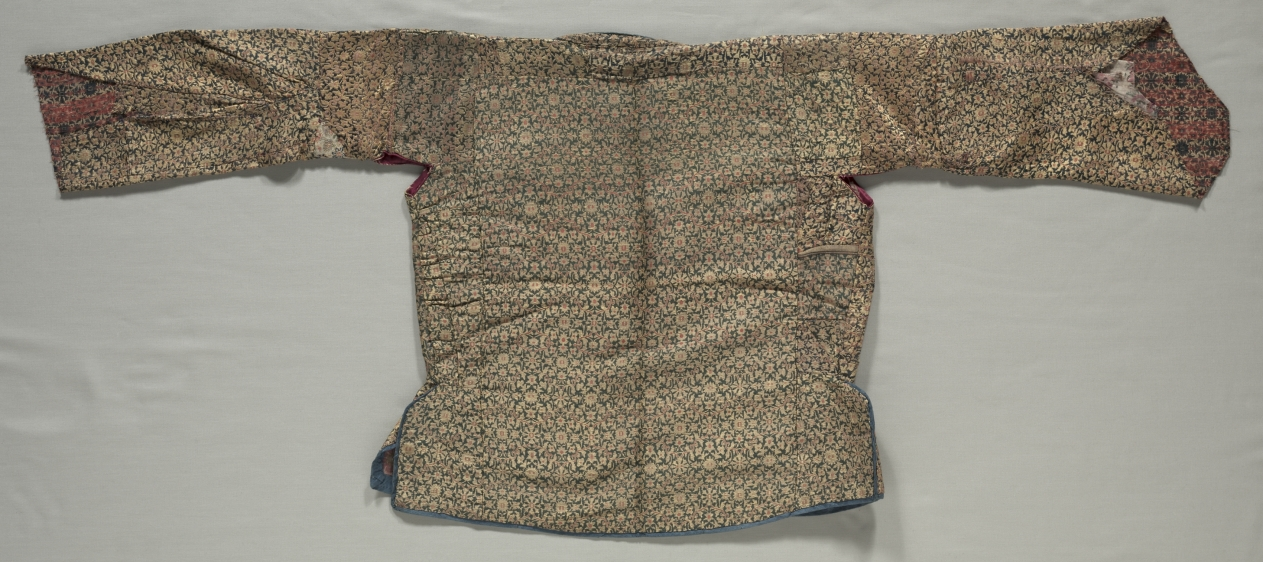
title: Jacket for a Child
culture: Iran, 18th century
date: 1700s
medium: Silk taquete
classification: Garment